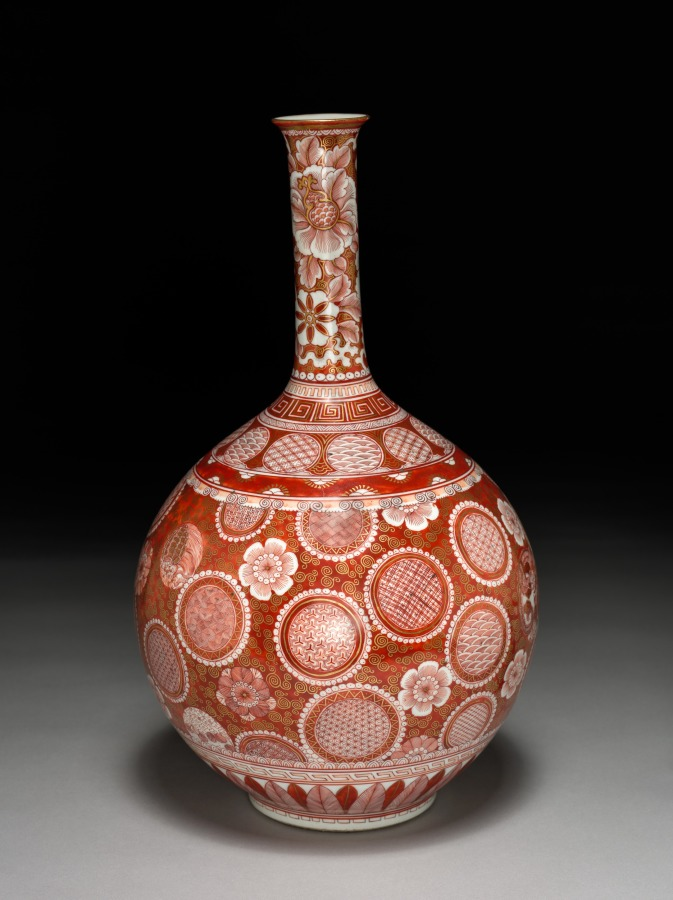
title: Vase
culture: Japan, Edo period (1615–1868)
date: early to mid-1800s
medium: porcelain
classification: Ceramic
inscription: on the base in red are "FUKU" (happiness) in a square and "ICHI-KA" in a fish.